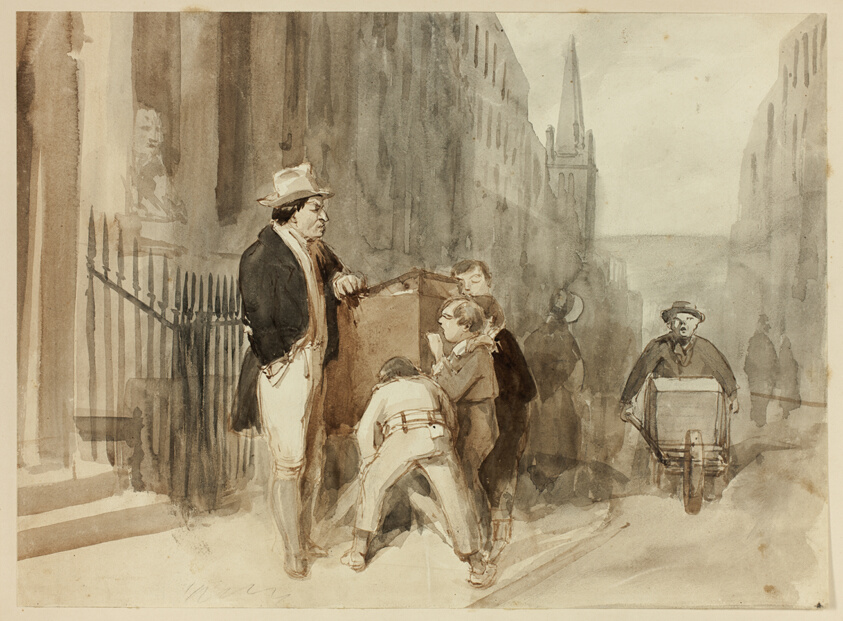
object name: Drawing and Watercolor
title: Boys at Peepshow in Street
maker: Clarkson Stanfield (English, 1793-1867)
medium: Brush and gray and brown wash, with graphite, on ivory wove paper, laid down on board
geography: England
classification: ink or chalk wash; drawings (visual works); prints and drawing; brush and wash; paper